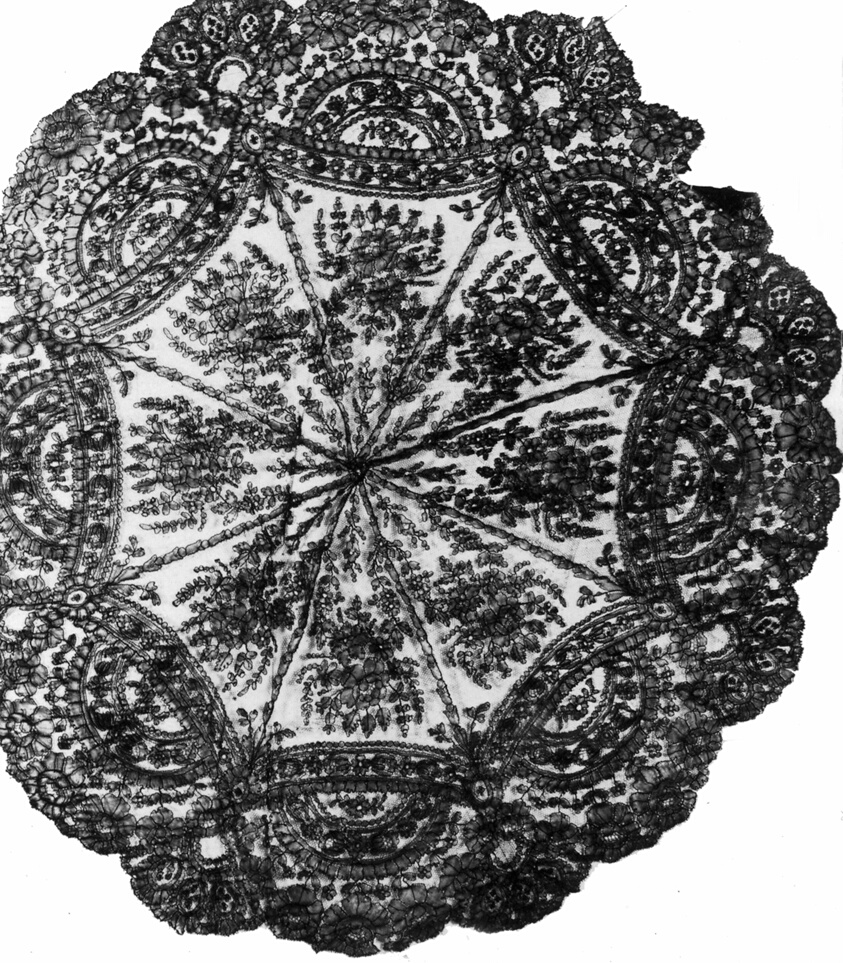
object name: Textile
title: Parasol Cover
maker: France, probably Bayeux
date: 1850/75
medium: Silk, bobbin straight lace (made in sections)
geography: Bayeux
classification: textile; lace - bobbin